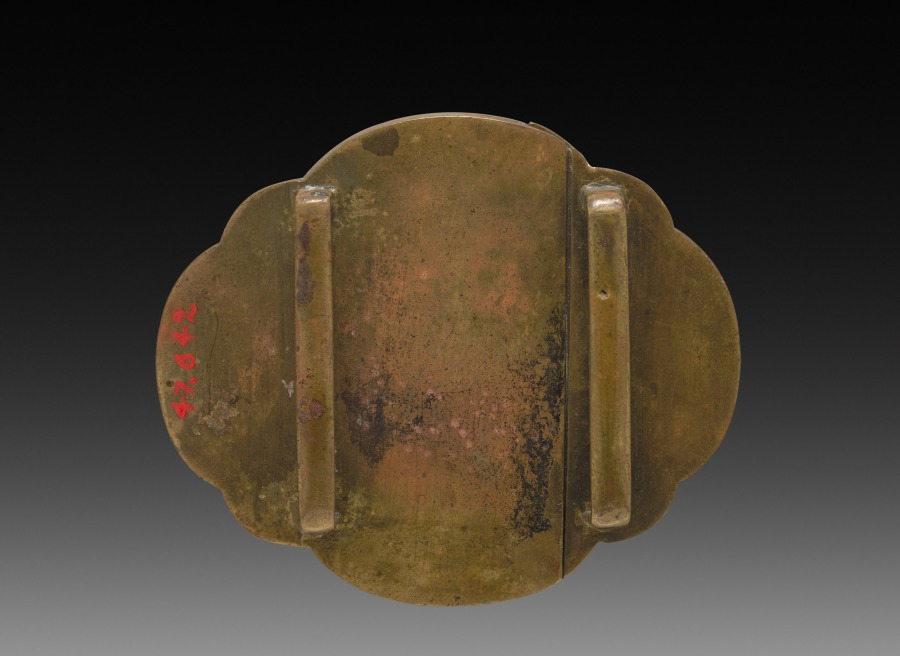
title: Buckle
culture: China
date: 1900s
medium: gilt brass, engraved and set with rose quartz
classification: Jewelry